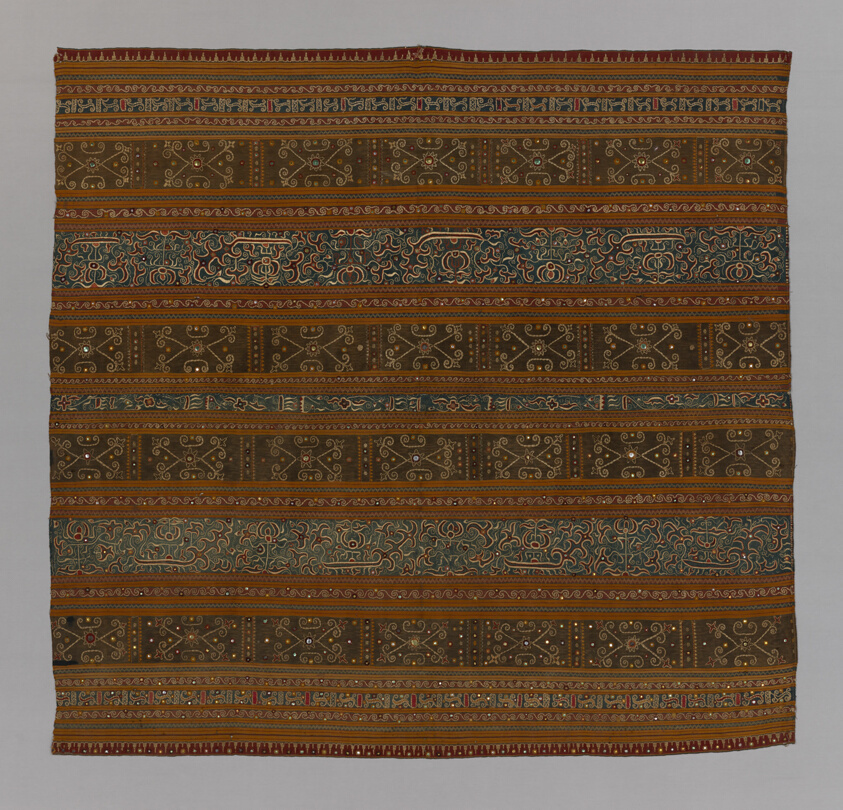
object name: Costume and Accessories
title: Tapis (Woman's Sarong)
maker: Indonesian, Sumatra, Lampong region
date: 19th century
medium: Cotton, silk, and mirror pieces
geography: Indonesia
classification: textile; weaving; costume